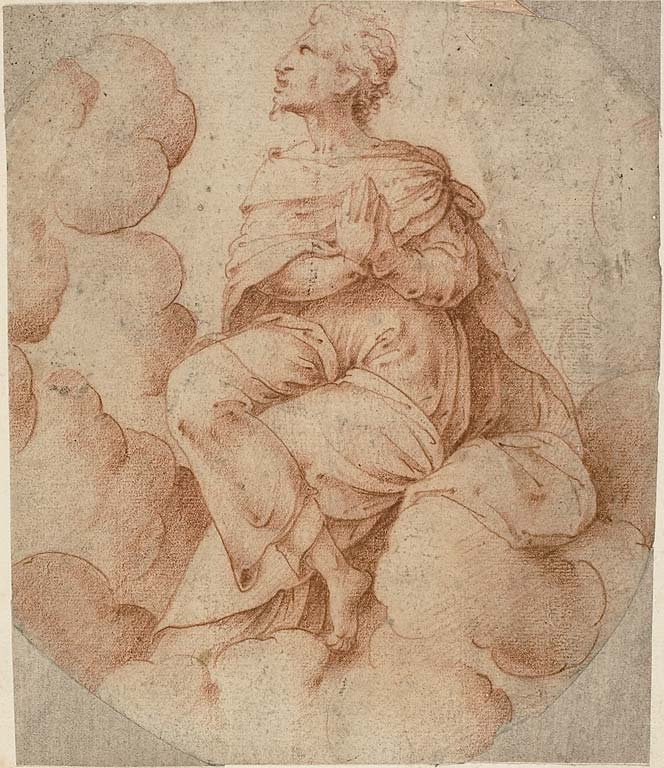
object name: Drawing and Watercolor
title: Man with Hands in Prayer, Seated in Clouds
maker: Attributed to Jean Duvet (French, 1485-c. 1570) or his circle; or the style of Jean Cousin, the younger (French, c. 1522-c. 1594)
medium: Red chalk on cream laid paper, laid down on ivory laid paper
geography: France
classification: chalk; drawings (visual works); prints and drawing